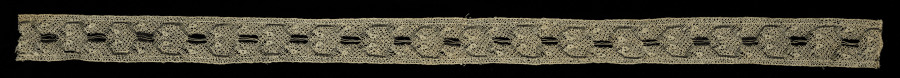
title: Lace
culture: Africa, North Africa, Morocco, Moroccan maker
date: 1800s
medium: Linen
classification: Lace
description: This fragment is an example of bobbin lace made of linen. It is a strip of insertion, which means it has two flat sides allowing it to be inserted into a garment as a panel.